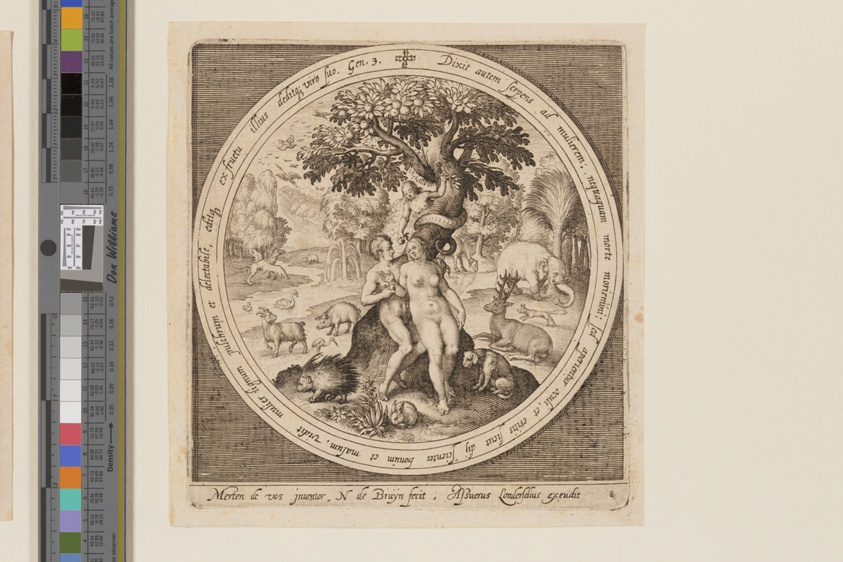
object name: Print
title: The Temptation of Eve, from The Creation to the Expulsion from Paradise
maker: Nicolaes de Bruyn (Flemish, 1571–1656); after Maarten de Vos (Flemish, 1532–1603)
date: c. 1610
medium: Engraving on ivory laid paper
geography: Flanders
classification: engraving; paper; print; prints and drawing